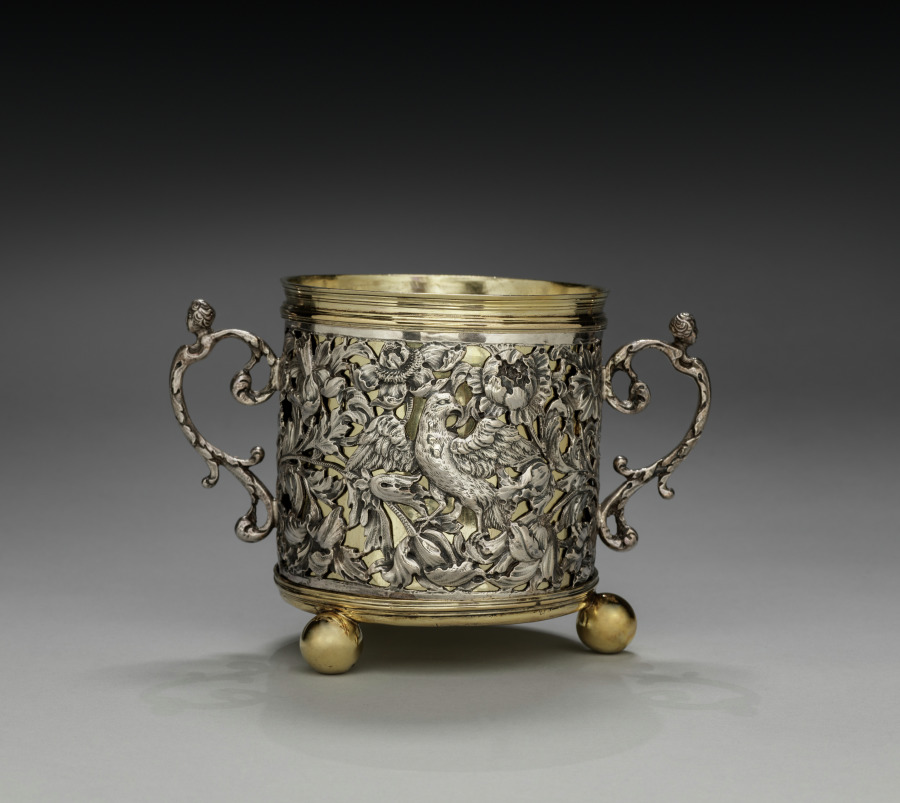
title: Two-Handled Cup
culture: England, London, 17th century (Charles II)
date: 1677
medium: silver and silver gilt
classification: Silver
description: Due to its size and ornament, this vessel may have functioned as a caudle-cup, containing a mixture of ale or wine and bread, oatmeal, eggs, sugar, and spices that was given to women after childbirth to help them regain their strength. The scrolling foliage and exotic birds along the exterior of this cup were likely based on prints circulating in the 1600s. The reclining female figures capping the handles and the acanthus bud finial on the accompanying lid recall common architectural motifs.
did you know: This two-handled cup is accompanied by a lid. See cover record.